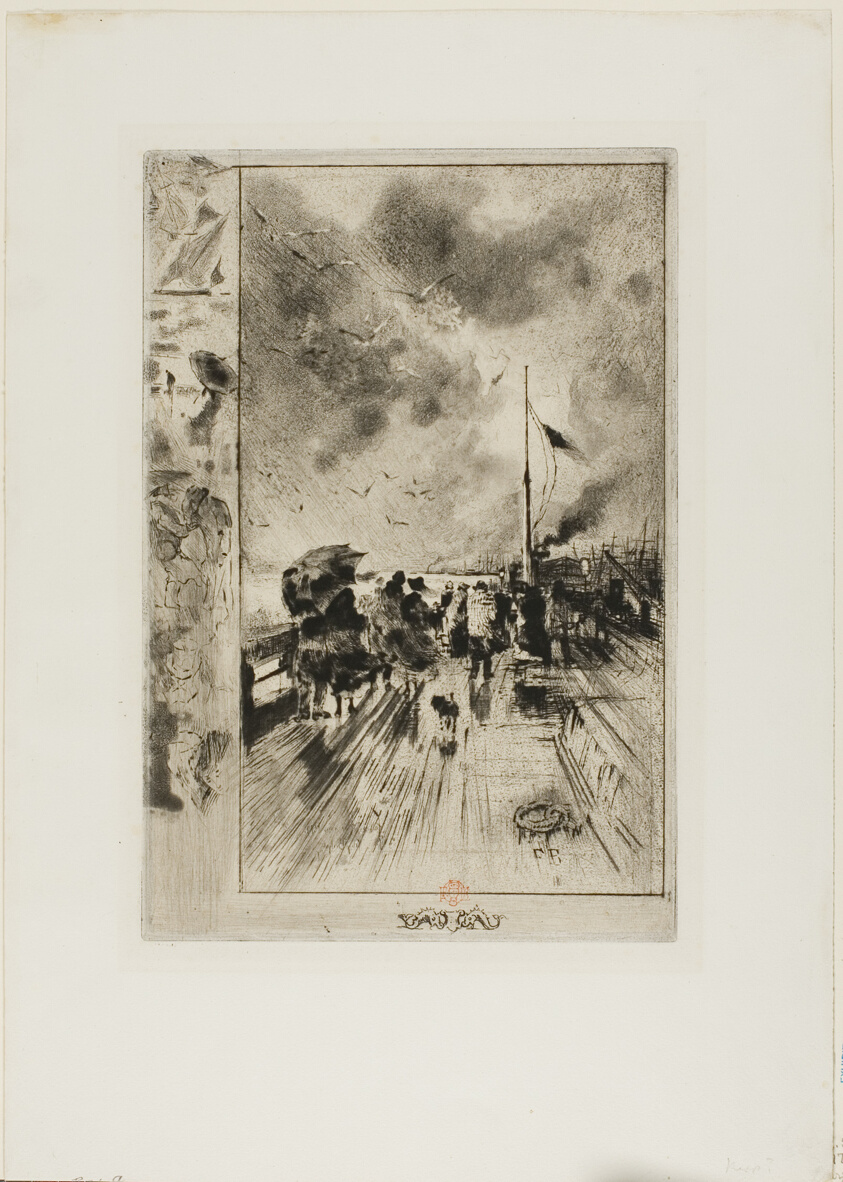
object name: Print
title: A Jetty in England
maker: Félix Hilaire Buhot (French, 1847-1898)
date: 1879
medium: Etching, aquatint, roulette and drypoint on white wove paper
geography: France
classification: etching; print; prints and drawing